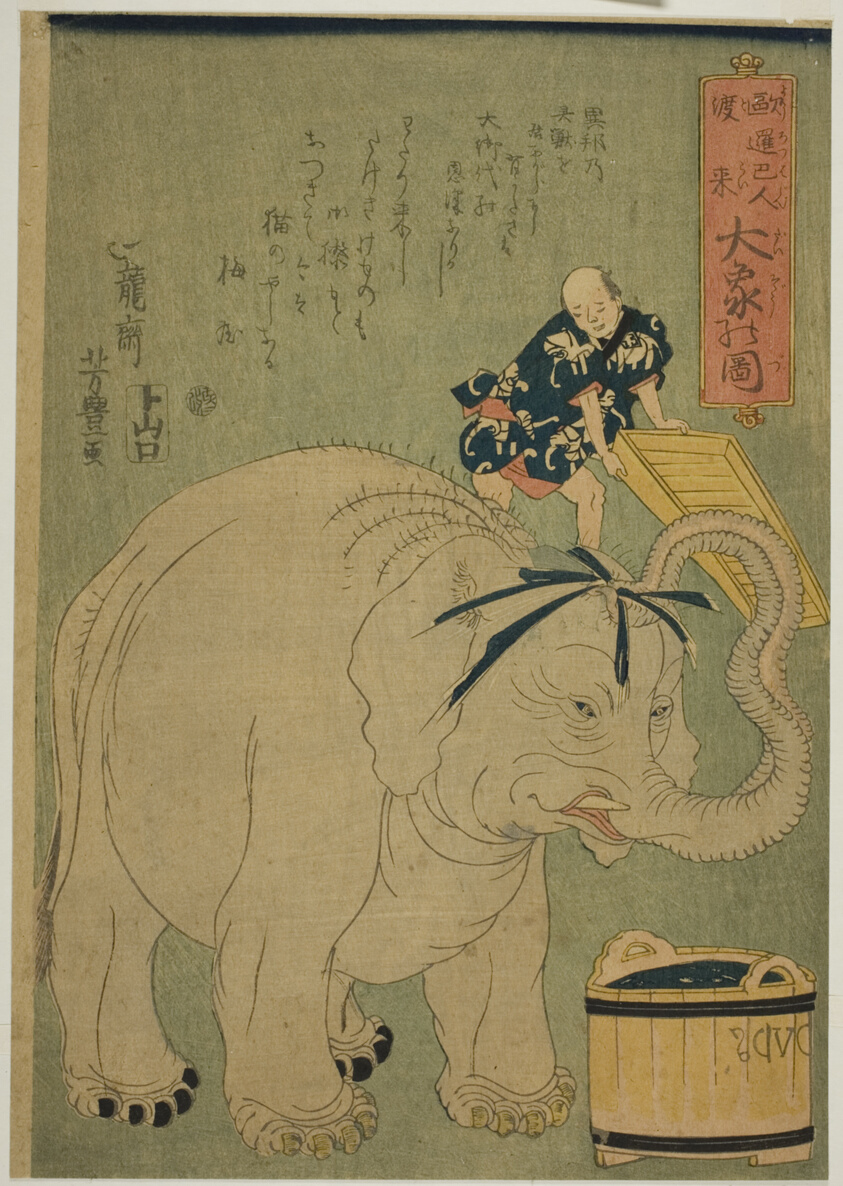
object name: Print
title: Arrival of the Europeans: The Great Elephant (Yoroppajin torai, Daizo no zu)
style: Japanese (culture or style)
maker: Utagawa Yoshitoyo (Japanese, 1830–1866)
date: 1863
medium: Color woodblock print; oban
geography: Japan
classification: woodblock print; print; asian art